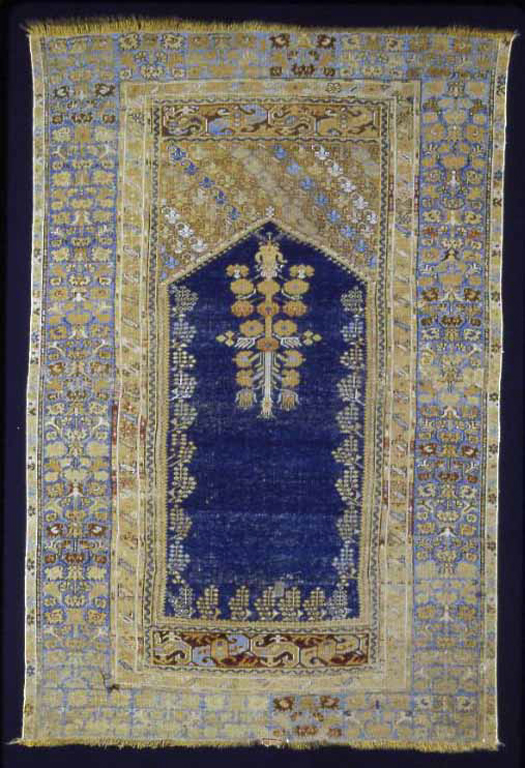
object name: Textile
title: Prayer Carpet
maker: Turkey, Anatolia, Kula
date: 1850/1900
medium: Wool, plain weave with supplementary wrapping wefts forming cut pile through a technique known as "Ghiordes (Turkish) knots;"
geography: Turkey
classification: weaving - carpet; textile